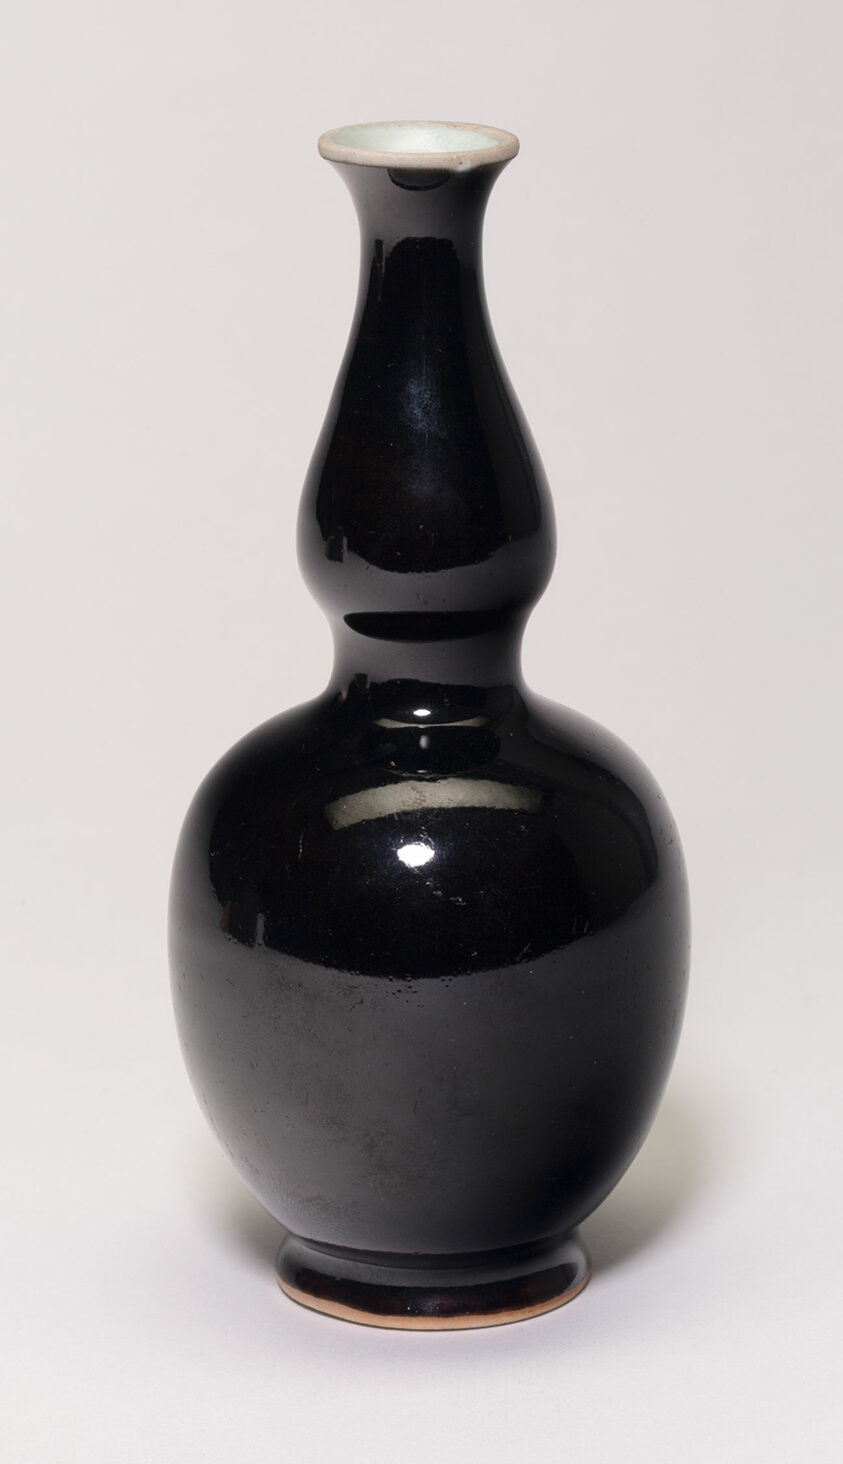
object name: Vessel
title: Gourd-Shaped Vase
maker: China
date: Qing dynasty (1644–1911), Kangxi period (1662–1722)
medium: Porcelain with mirror black glaze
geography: China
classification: porcelain; asian art; ceramics